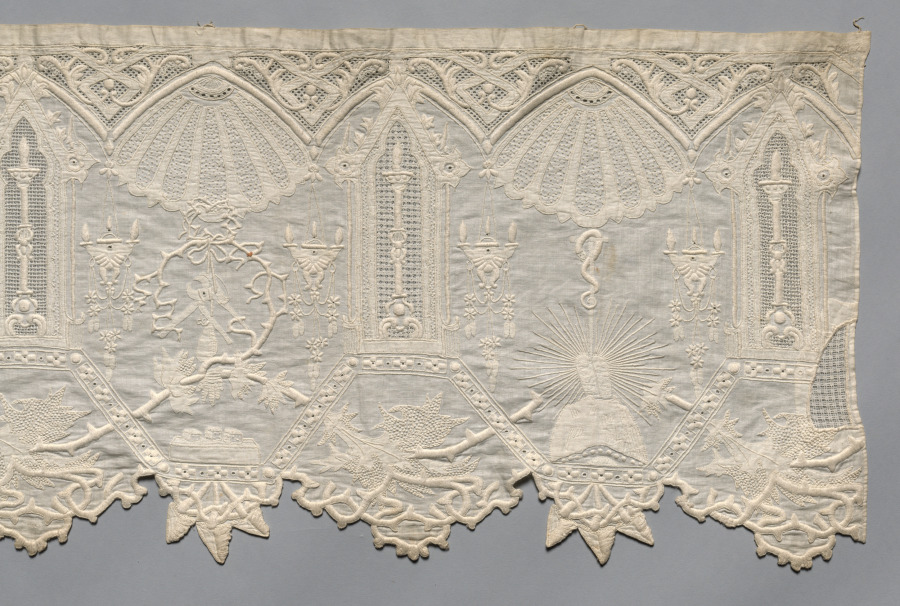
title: Altar Cloth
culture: Italy(?)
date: 1800s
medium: Plain weave cotton: needle lace (drawnwork), appliqué, and embroidery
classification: Embroidery